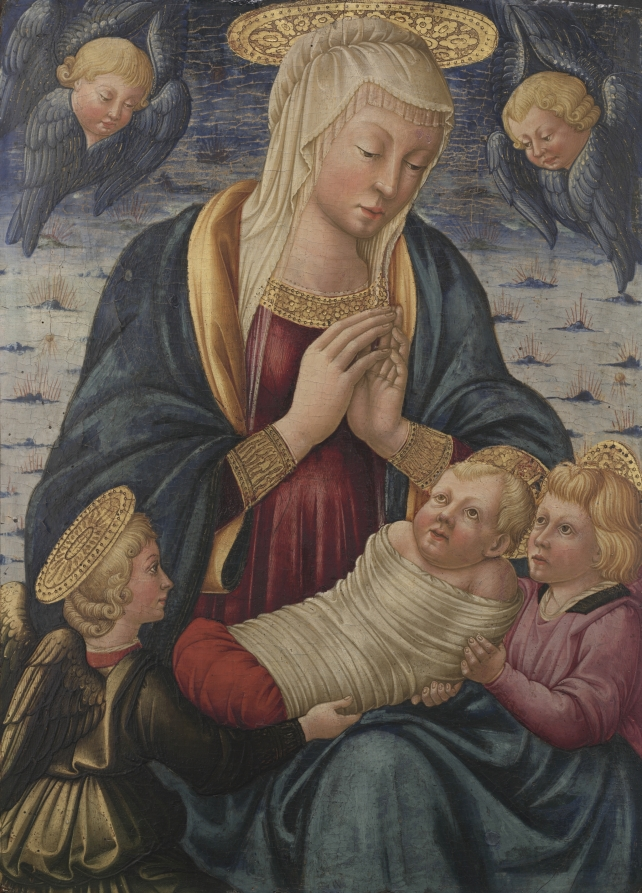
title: Virgin and Child with Angels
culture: Italy, 15th century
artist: Neri di Bicci (Italian, 1419–1491)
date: after 1460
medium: tempera on wood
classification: Painting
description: Neri de Bicci was a prolific painter of mainly religious themes, active principally in Florence as a panel painter. His grandfather, Lorenzo di Bicci was also a painter in Florence. His journals from the years 1453–75, including the rates of payment for his work, are still preserved in the library of the Uffizi Gallery in Florence.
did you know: The removal of a thick coat of soiled and discolored varnish in 1943 gave this painting new life.